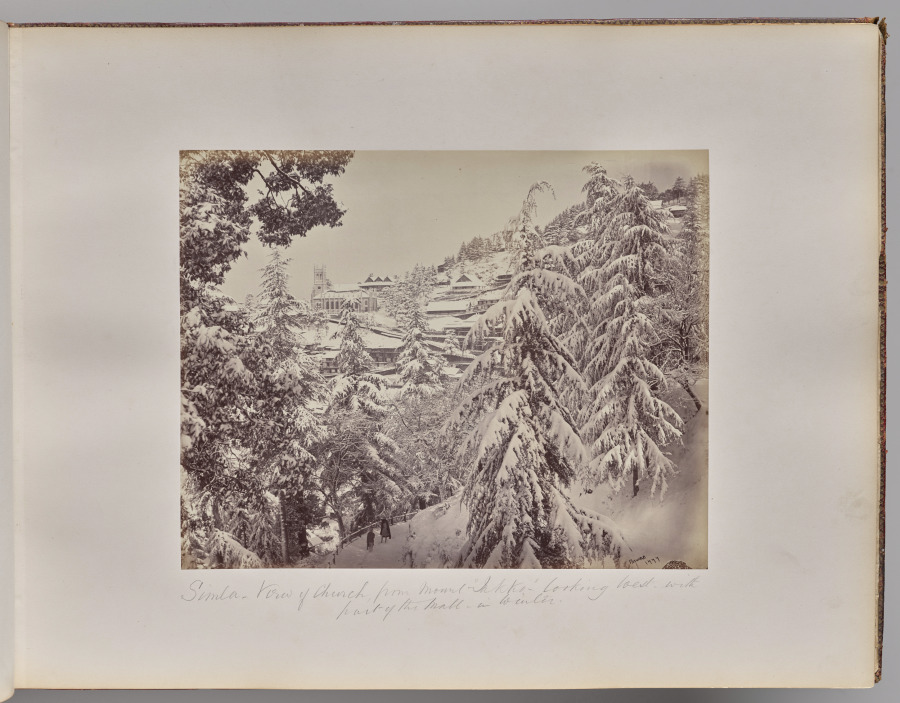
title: Shimla. View of the Church from Mount Jakko Looking West with Part of the Mall in Winter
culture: England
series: Photographs of Northern India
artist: Samuel Bourne (British, 1834–1912)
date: 1863–70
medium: albumen print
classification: Photograph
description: The 50 images in this album, all taken in the 1860s, move from the hill towns of the Himalayas down to cities including Lahore (now in Pakistan), Delhi, Lucknow, Agra, Benares (now Varansi), and Calcutta (now Kolkata). Architectural studies of major monuments offer valuable historical records of what sites such as the Taj Mahal and the imperial mosque of the Mughal emperors in Delhi looked like before 20th-century restorations.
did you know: Samuel Bourne, the author of most the images in this album, was a banker in England before he moved to India to become a professional photographer.